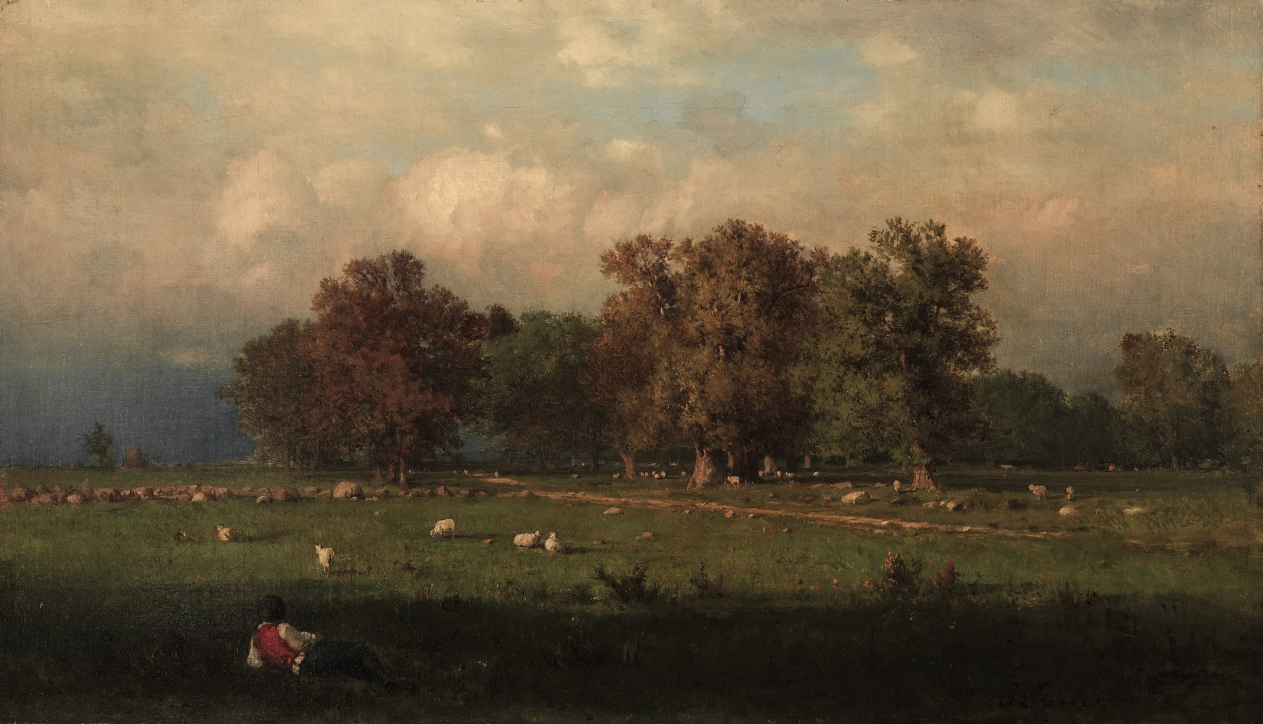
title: Durham, Connecticut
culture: America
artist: George Inness (American, 1825–1894)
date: 1858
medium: oil on canvas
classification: Painting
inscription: signed lower right: G. Inness [infrared shows a second signature: G. Inness 1858]